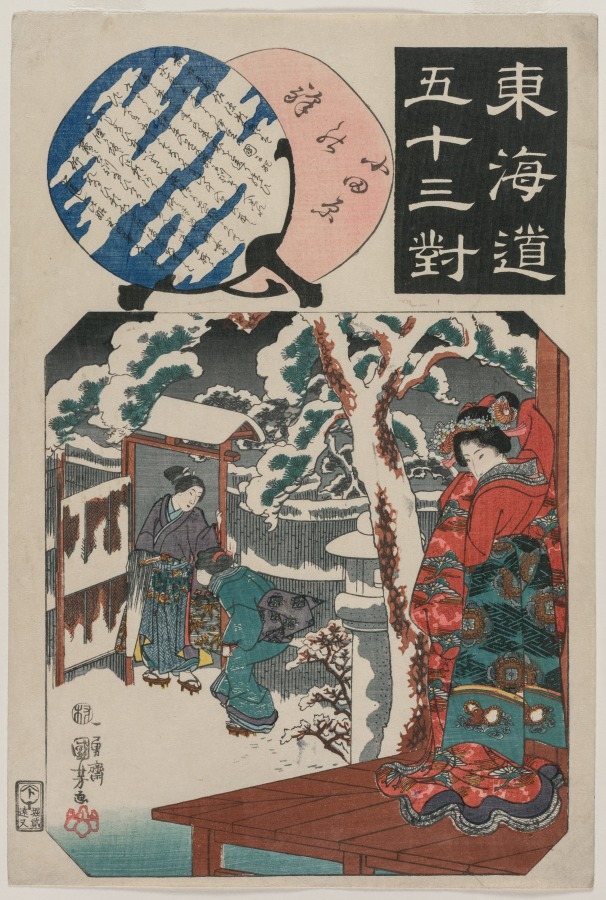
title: Odawara Station: Minamoto Yoritomo Visits the Daughter of Ito Nyudo (from the series Fifty-three Paired Illustrations for the Tokaido)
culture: Japan, Edo period (1615–1868)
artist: Utagawa Kuniyoshi (Japanese, 1797–1861)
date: mid-1840s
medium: color woodblock print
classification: Print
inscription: Signature: Ichiyūsai Kuniyoshi ga. Artist Seal: Paulownia.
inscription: Publisher: Enshuya Matabei (Hori 2, emblem). Censorship Seal: Mura.